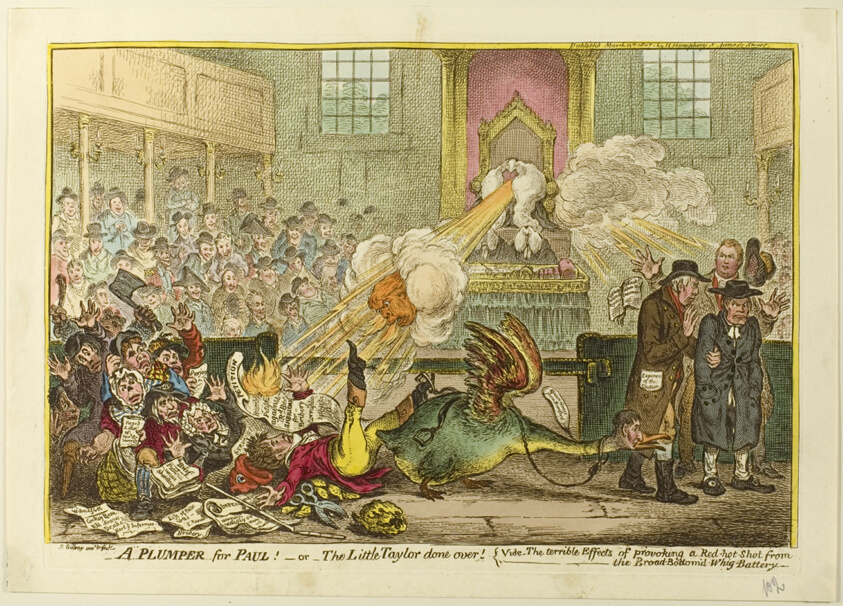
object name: Print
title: A Plumper for Paul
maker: James Gillray (English, 1756-1815); published by Hannah Humphrey (English, c. 1745-1818)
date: published March 13, 1807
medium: Hand-colored etching on paper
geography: England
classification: etching; print; prints and drawing